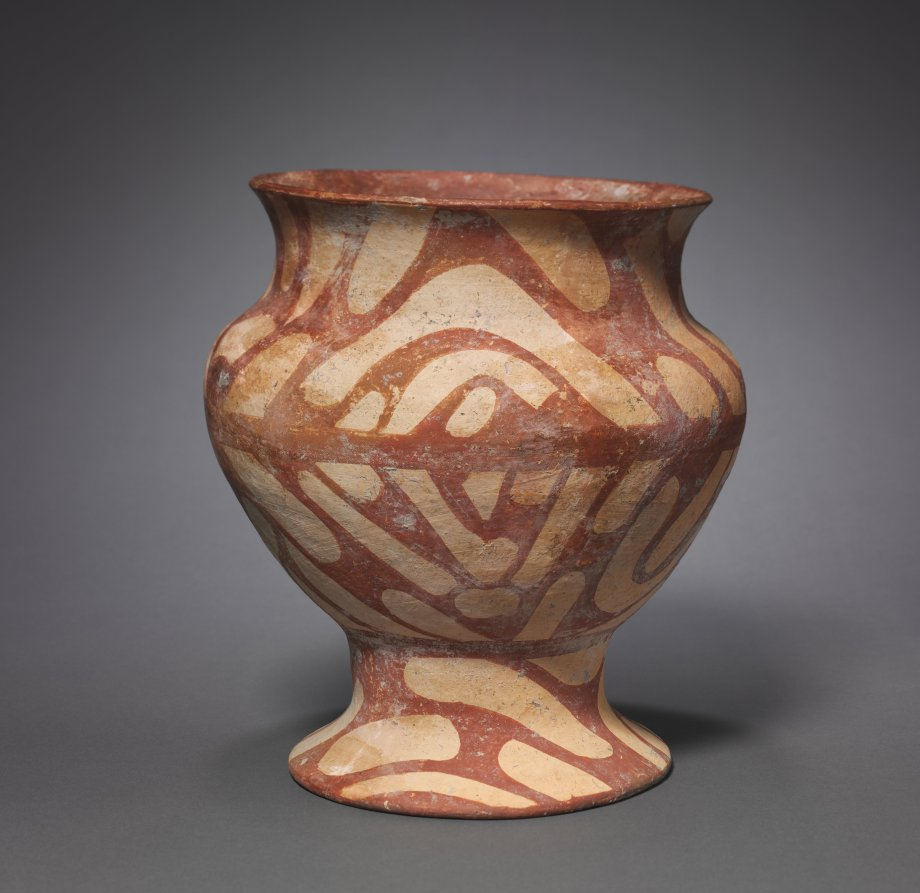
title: Jar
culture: South East Asia, Thailand, Ban Chiang, Neolithic period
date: 3000 BCE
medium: earthenware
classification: Ceramic